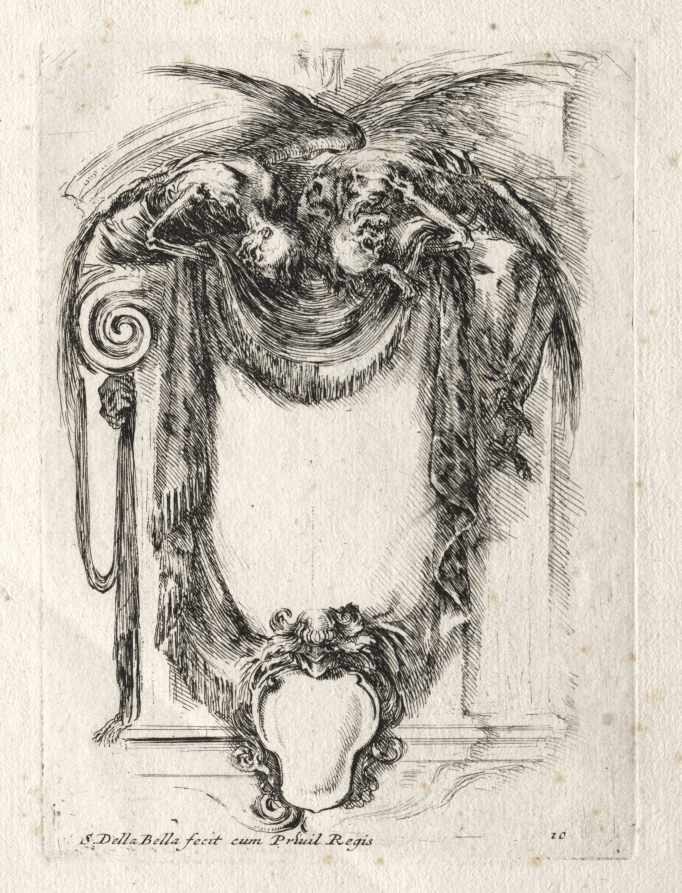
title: New Model for a Cartouche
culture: Italy, 17th century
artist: Stefano Della Bella (Italian, 1610–1664)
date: 1647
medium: etching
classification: Print